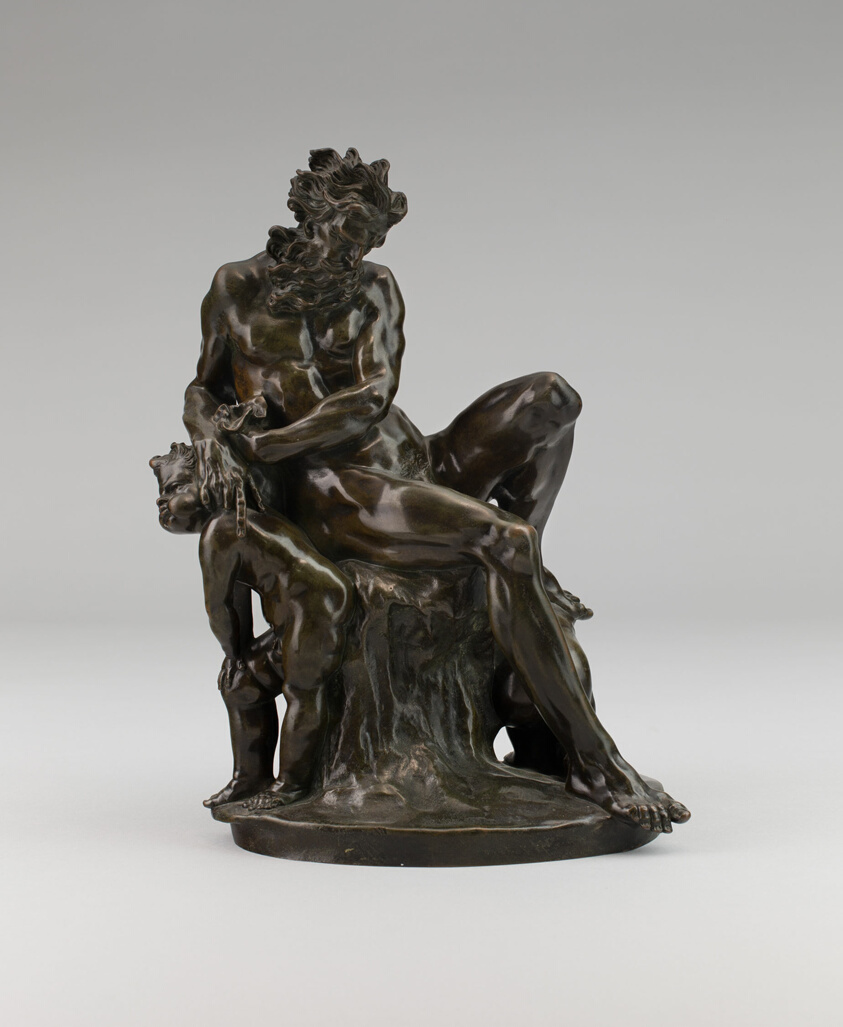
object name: Sculpture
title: Aeolus and the Winds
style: 17th Century, 18th Century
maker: Flemish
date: 1600/1700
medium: Bronze, dark brown patina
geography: Flanders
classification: statuette; sculpture; bronze; flemish; metal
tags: Greek mythology, Greek, mythology, mythical, mythological figures, bearded man, nudes, children, child, man